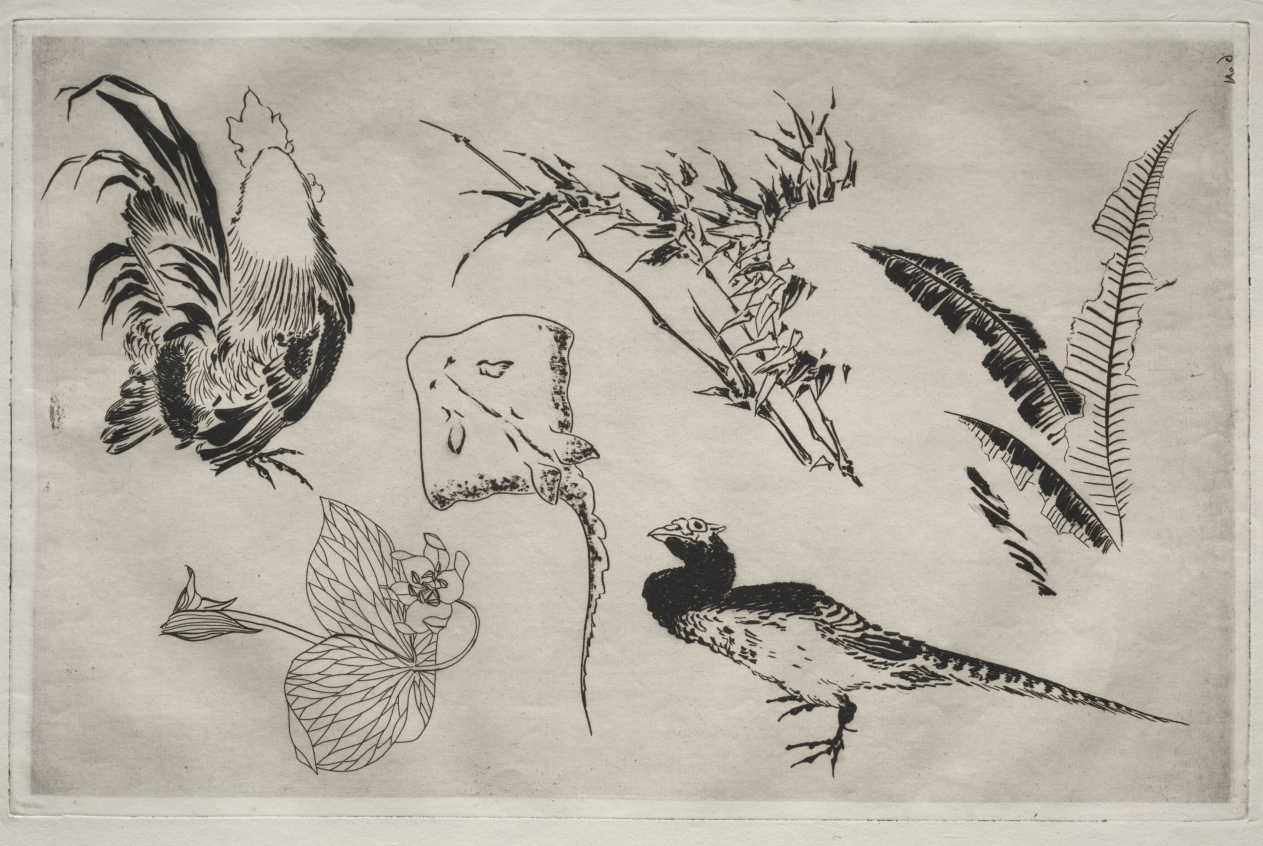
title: Dinner Service (Rousseau service): Roosters, skate, plants, etc. (no. 9)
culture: France, 19th century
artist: Félix Bracquemond (French, 1833–1914)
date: 1866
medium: etching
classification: Print